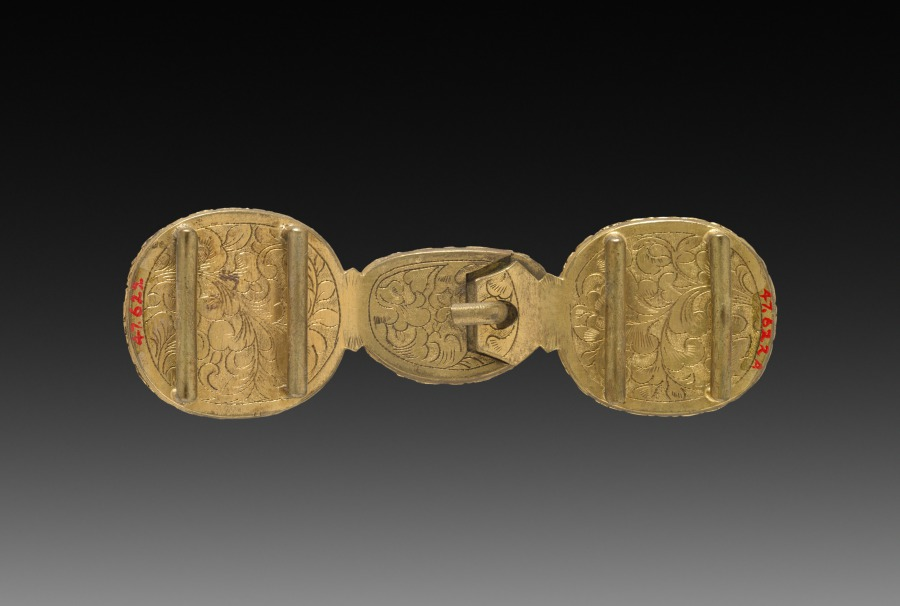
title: Buckle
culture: China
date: 1900s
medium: Brass, gilt and engraved and set with jade, kunzite, and ruby or spinel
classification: Jewelry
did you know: The pink gemstone kunzite may be sourced from Afghanistan, Pakistan, or Brazil.